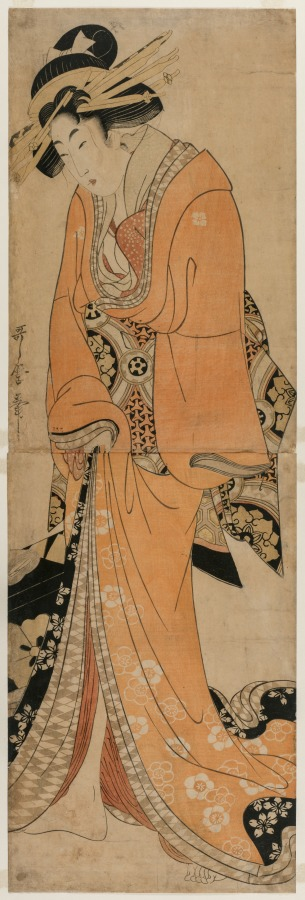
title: Geisha Standing Beside a Shamisen Case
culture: Japan, Edo period (1615–1868)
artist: Kitagawa Utamaro II (Japanese, d. 1831?)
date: c. 1810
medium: color woodblock print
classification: Print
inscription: Signature: Utamaro hitsu